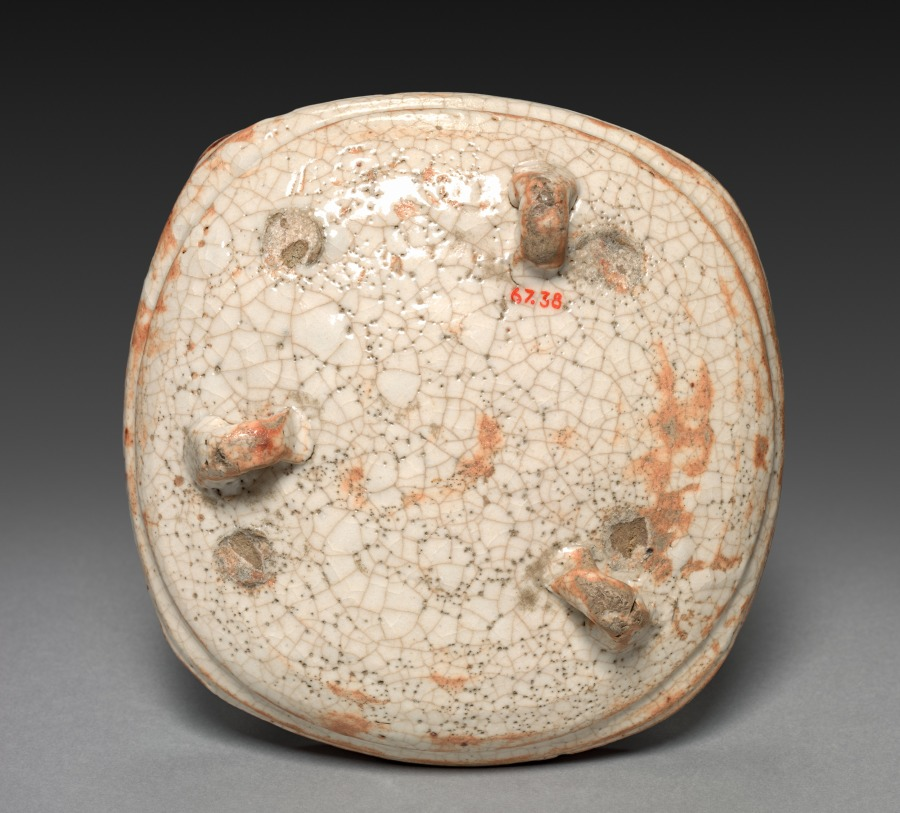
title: Dish with Design of Plum Trees: Shino Ware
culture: Japan, Momoyama period (1573–1615)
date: late 1500s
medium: stoneware with underglaze iron slip decoration (Mino ware)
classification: Ceramic